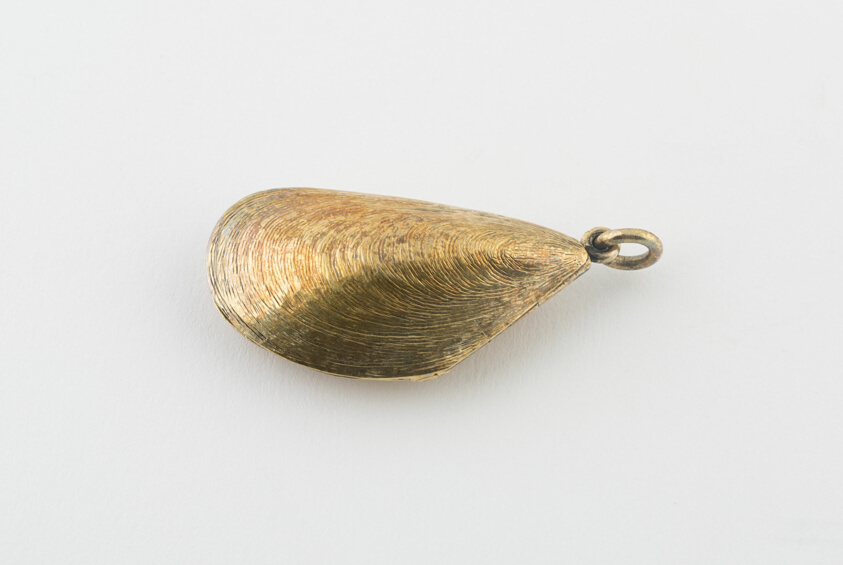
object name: Metalwork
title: Vinaigrette in the Form of a Mussel Shell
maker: London, England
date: 1876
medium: Silver gilt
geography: London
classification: vinaigrette (container for health care); container for personal use; box; european decorative arts; metalwork; silver; decorative object/ornament